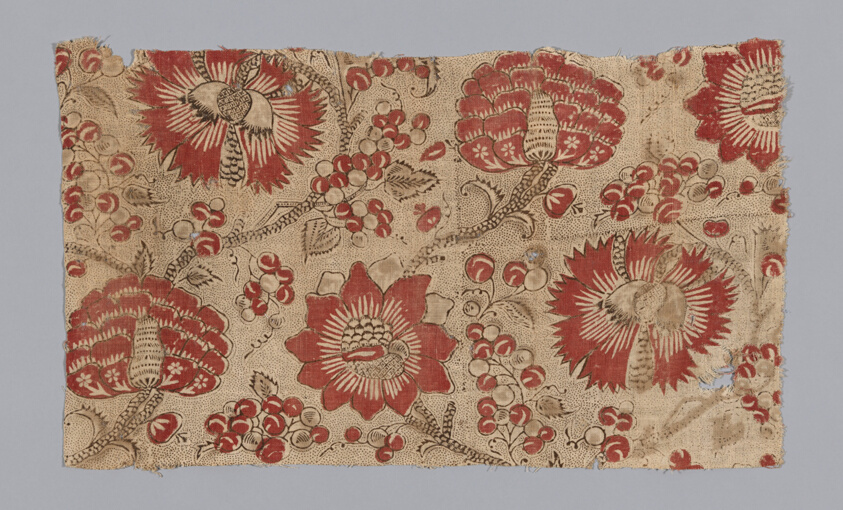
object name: Textile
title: Panel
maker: France, Bordeaux or Nantes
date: c. 1770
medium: Cotton, plain weave; block printed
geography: France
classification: textile; weaving - printed; weaving